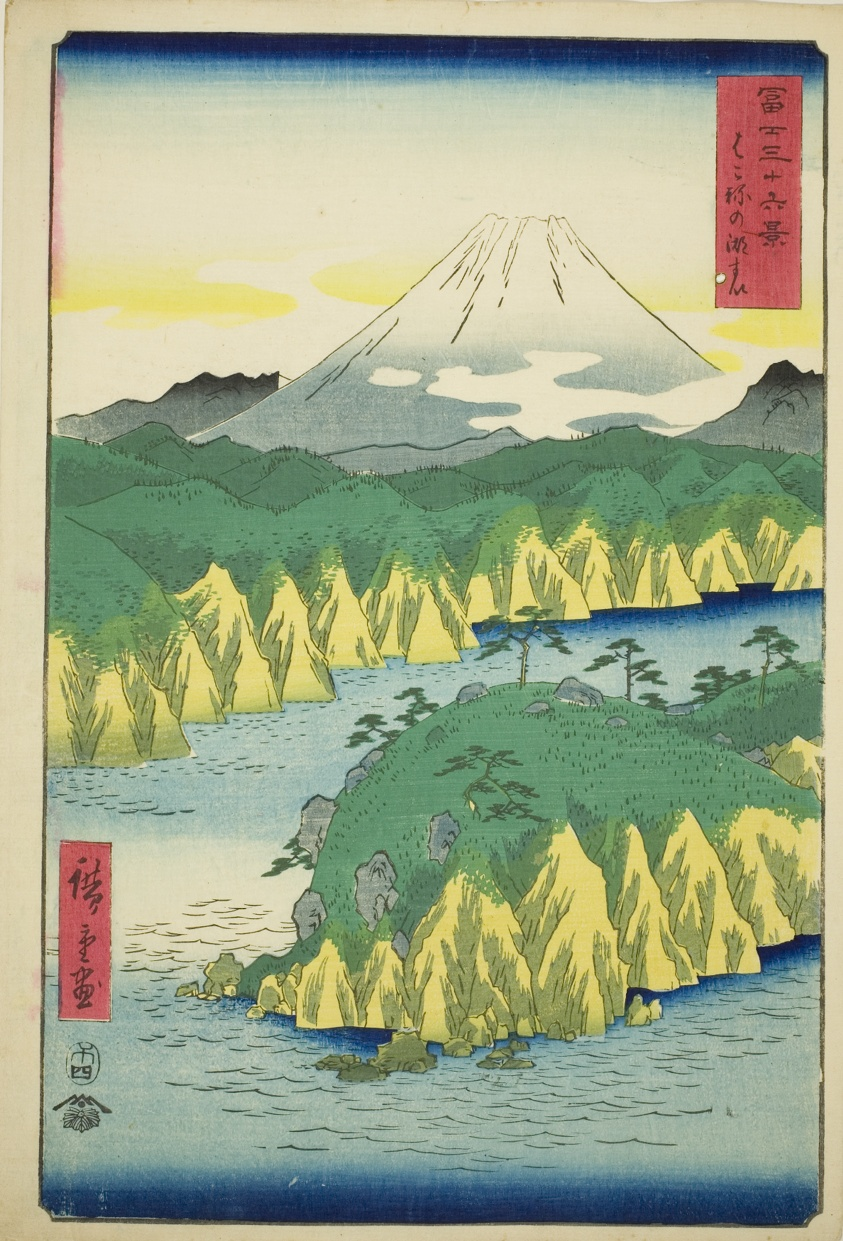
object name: Print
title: Lake at Hakone (Hakone no kosui), from the series "Thirty-six Views of Mount Fuji (Fuji sanjurokkei)"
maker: Utagawa Hiroshige 歌川 広重; Japanese, 1797-1858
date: 1858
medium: Color woodblock print; oban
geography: Japan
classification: print; asian art